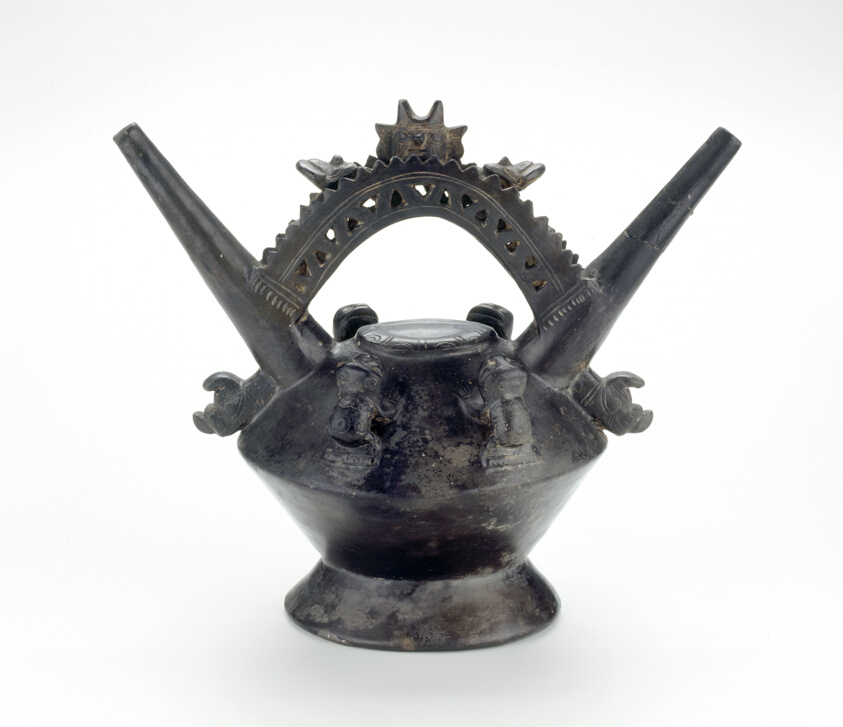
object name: Vessel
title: Vessel with Double-Horned Spouts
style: lambayeque, late intermediate period, Pre-Columbian, americas, andes, Arts of the Americas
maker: Lambayeque (North coast, Peru)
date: 1000–1470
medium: Ceramic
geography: Peruvian North Coast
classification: earthenware; ceramics; vessel; art of the americas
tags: abstract figures, animals, masks, frog